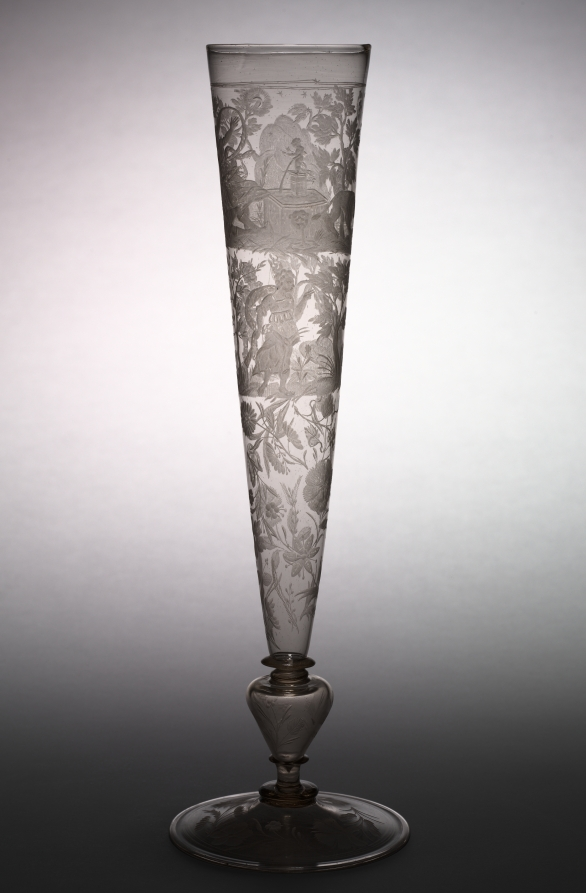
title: Flute Glass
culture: Germany, Thuringia, early 17th century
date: early 1600s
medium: glass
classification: Glass